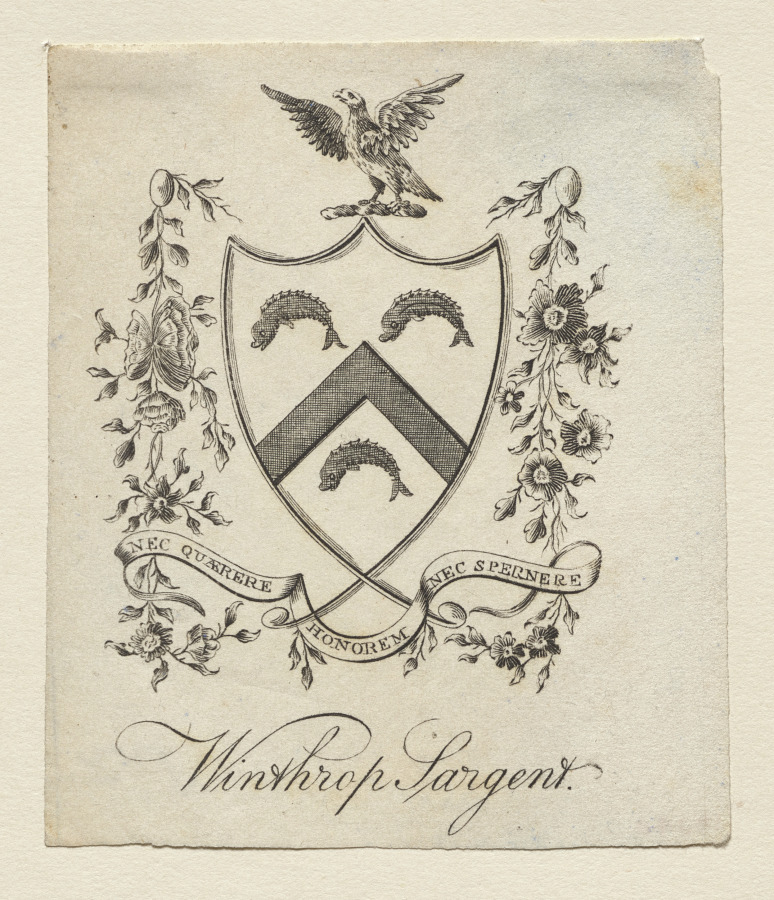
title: Bookplate: Coat of Arms with Winthrop Sargent inscribed below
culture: America, late 18th-early 19th century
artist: attributed to Joseph Callender (American, 1751–1821)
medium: engraving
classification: Print